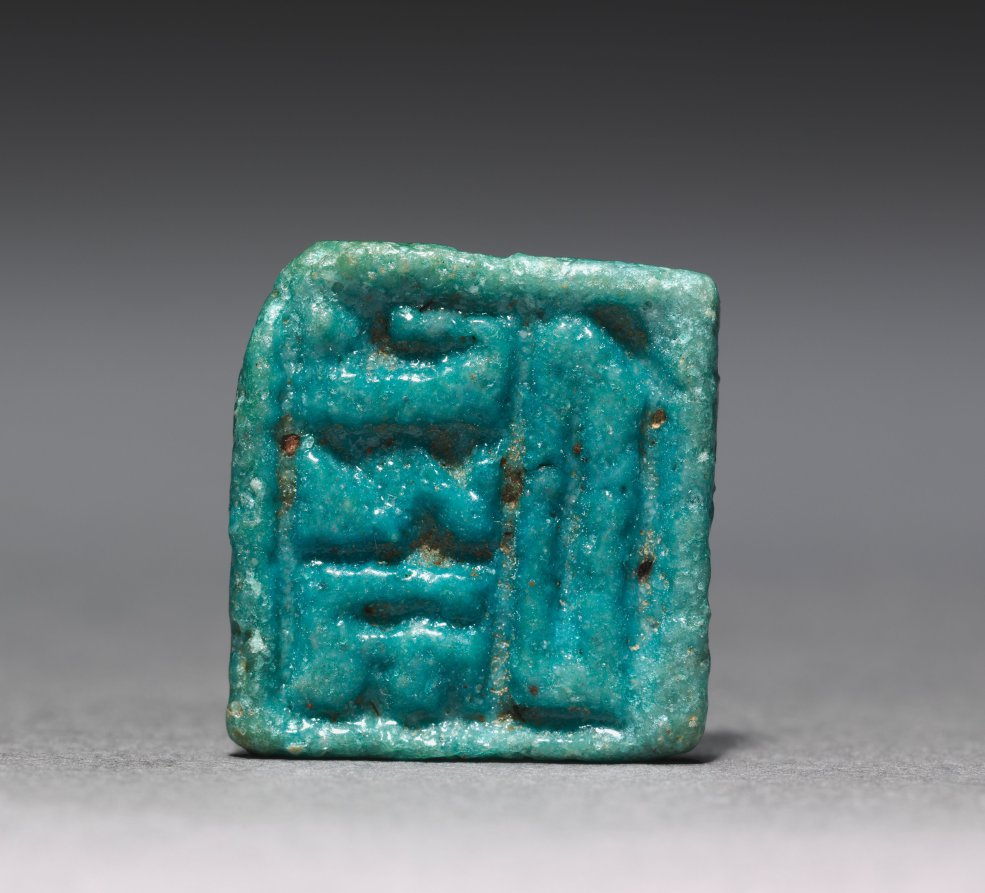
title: Stamp-Seal Amulet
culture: Egypt, Late period (715–332 BCE), Dynasty 26 or later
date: 664–525 BCE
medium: turquoise blue faience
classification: Amulets